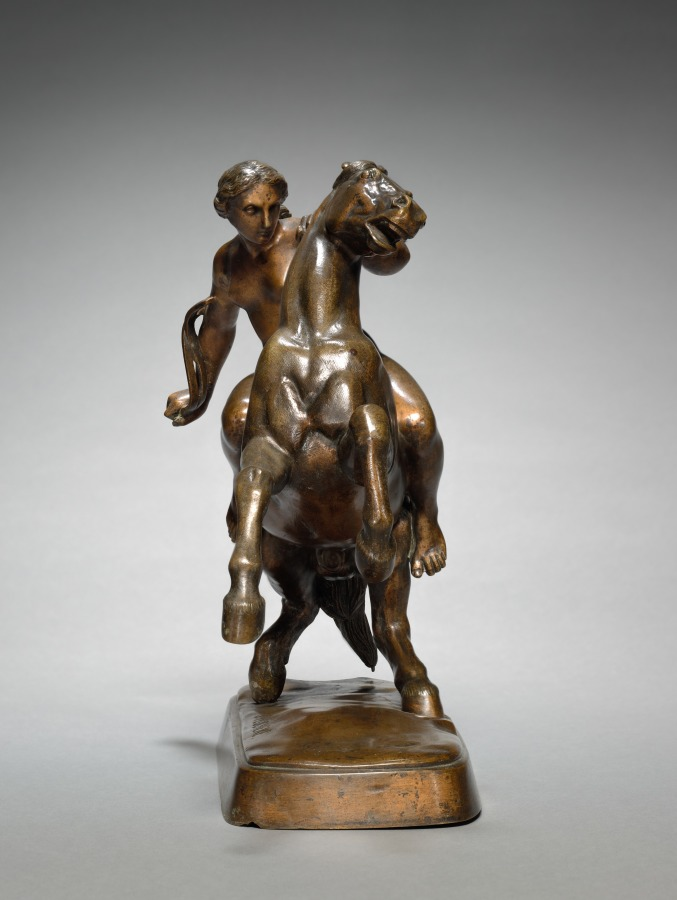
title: Amazon Taming a Horse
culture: France, 19th century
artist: Jean-Jacques Feuchère (French, 1807–1852)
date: c. 1840–1843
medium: bronze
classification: Sculpture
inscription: signed on base: "J. FEUCHÈRE"